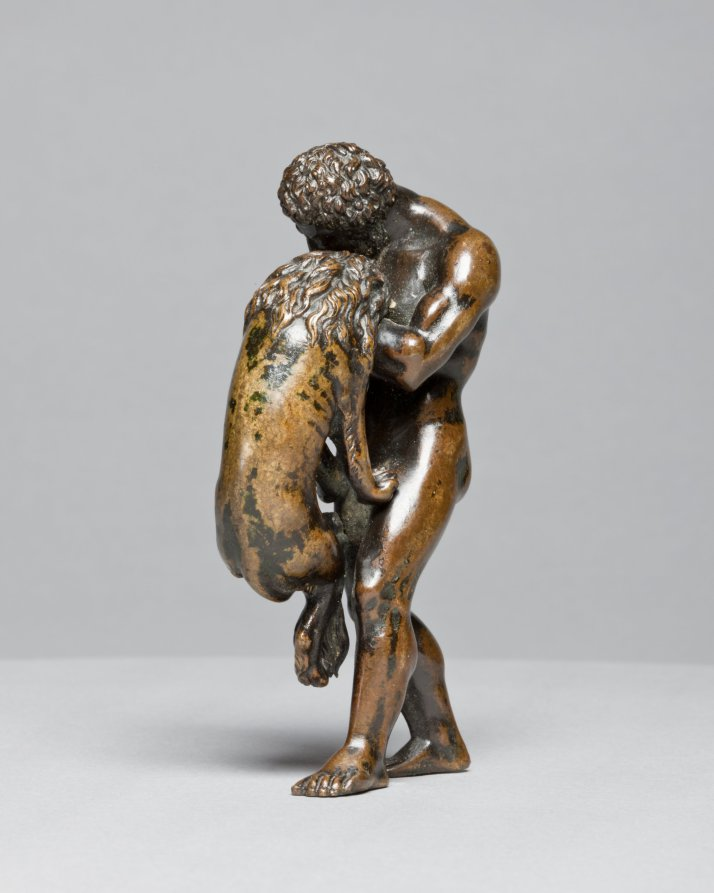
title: Hercules and the Nemean Lion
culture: Italy or France, 16th century or later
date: 1500s or later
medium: bronze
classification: Sculpture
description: The original owner of this work would have understood that this scene referred to the entire story of Hercules, the demi-god who had to accomplish twelve labors. The lion is named after the city of Nemea, near Corinth, a monstrous beast sent by the goddess Hera to wreak havoc on the area. After killing the lion, Hercules wore his pelt, commonly seen in other representations of the hero.